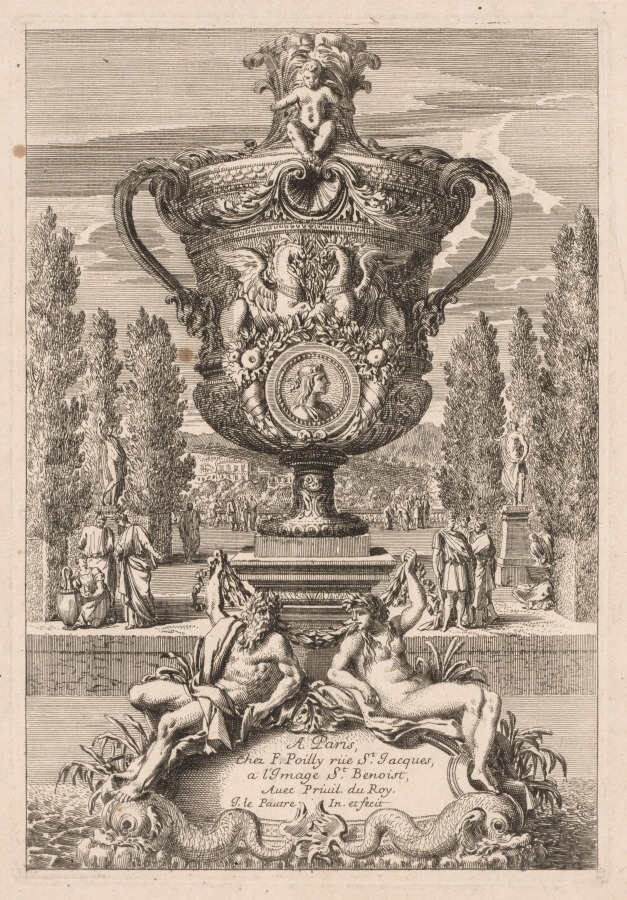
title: Decorative Urn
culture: France, 17th century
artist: Jean Le Pautre (French, 1618–1682)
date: 1600s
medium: etching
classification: Print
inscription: inscribed, within image, in plate: A Paris, / Chez F. Poilly rue St. Jacques, / a l'Image St. Benoist, / Avec Privil. du Roy, / J. le Pautre in. et fecit